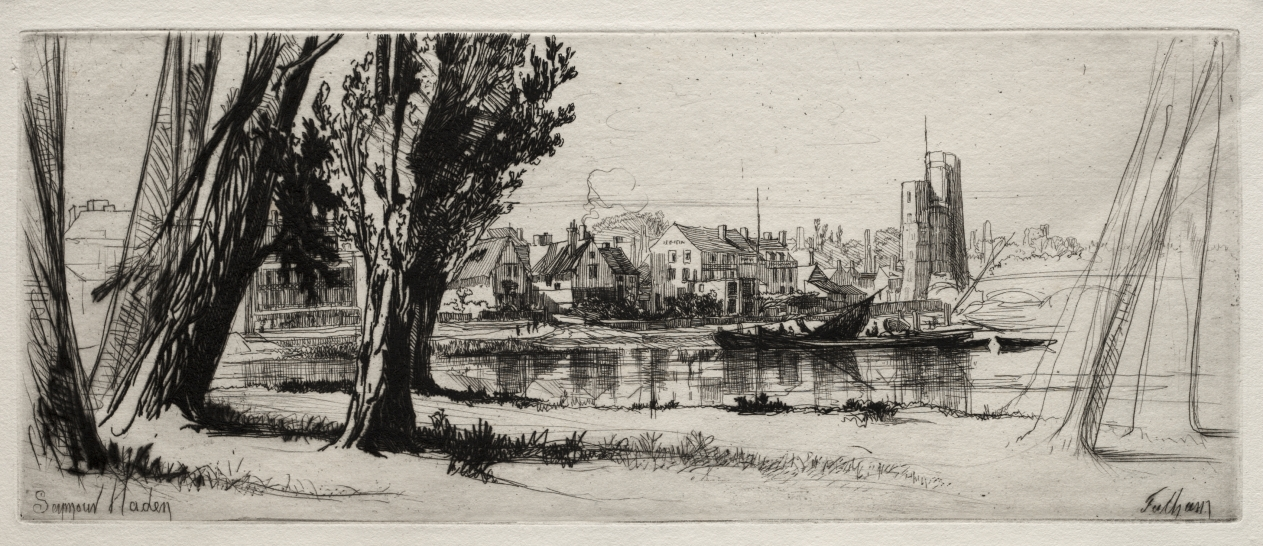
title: Fulham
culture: England, 19th century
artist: Francis Seymour Haden (British, 1818–1910)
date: 1859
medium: etching and drypoint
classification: Print